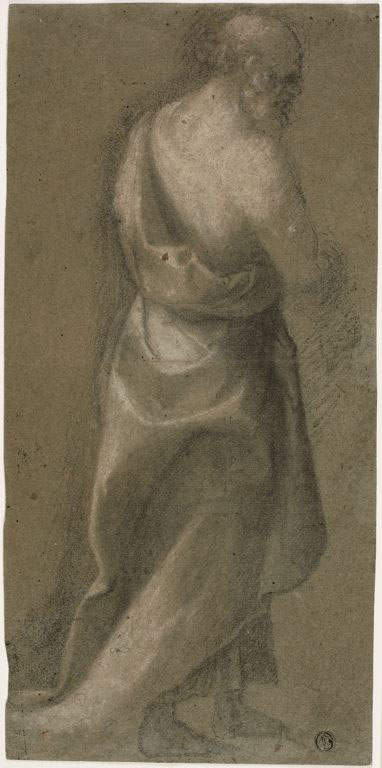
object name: Drawing and Watercolor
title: Standing Draped Male Figure in Three-quarters Profile (recto); Putto (verso)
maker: Follower of Baccio della Porta, called Fra Bartolommeo; Italian, 1472-1517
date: 1540/50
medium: Black and white chalk (recto) and black chalk (verso), on blue-brown laid paper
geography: Italy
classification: chalk; drawings (visual works); prints and drawing